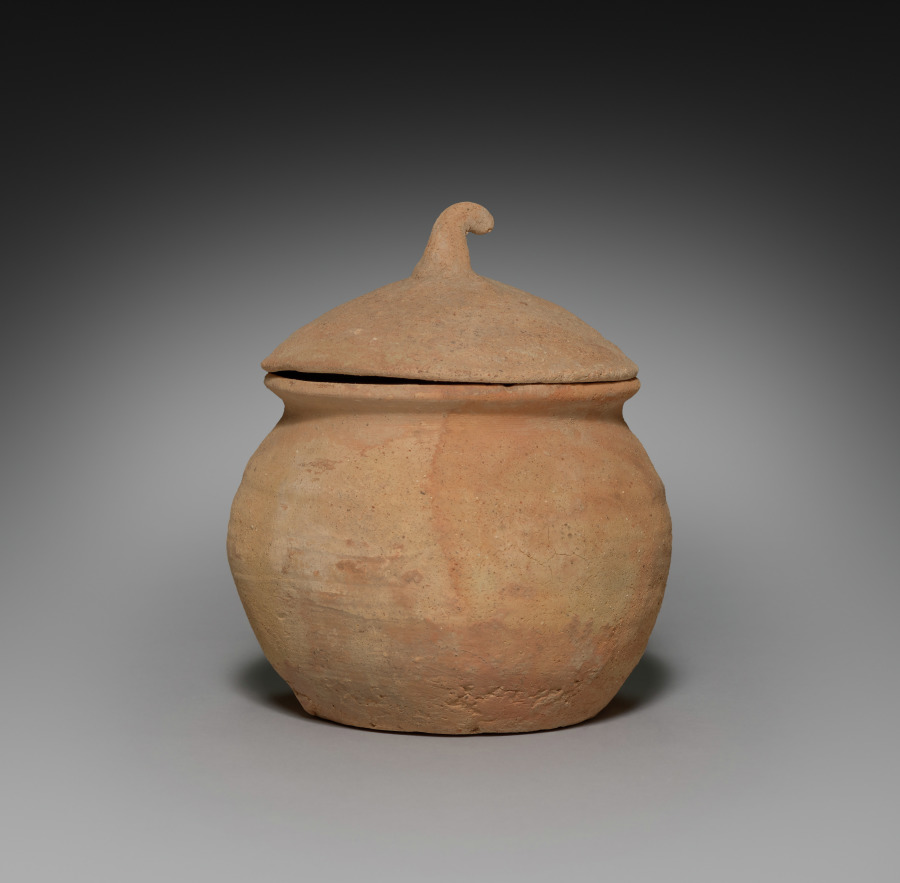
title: Lidded Jar with Horn Handle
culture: Korea, Silla (57 BC-935) or Kaya (AD 42-562) period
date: 400s–500s CE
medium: red earthenware with applied red slip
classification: Ceramic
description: Early earthenware from the Three Kingdoms period (57 BCE–668) became widely utilized as agriculture and religion grew to be essential elements in sustaining society and its systems. The clay jars of different sizes and shapes on display were made for the following purposes: some were used to store harvested grains and seeds, some, especially lidded ones, to preserve cremated remains, and some to serve offerings in rituals.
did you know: Closed kilns built on hillsides became widely used for producing this type of pottery vessel in Korea during the Three Kingdoms period.